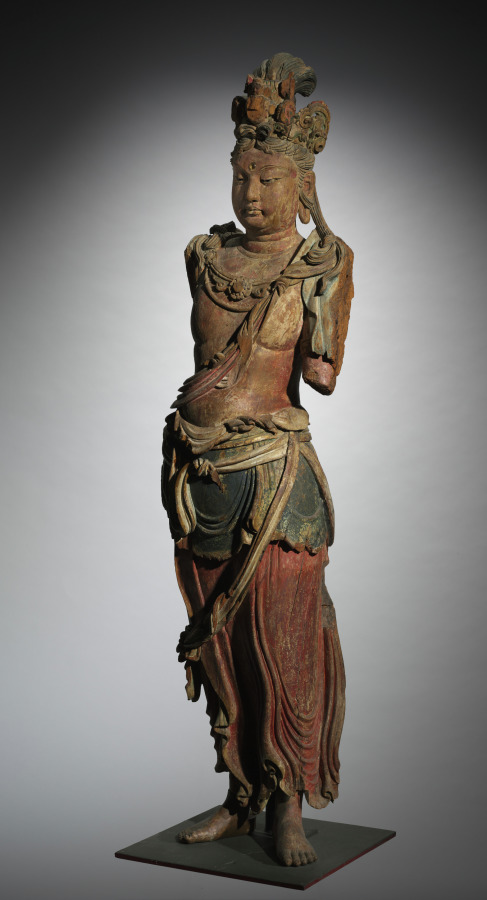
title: Eleven-Headed Guanyin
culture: China, late Northern Song dynasty (960-1127) - Jin dynasty (1115-1234)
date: 1100–1200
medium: wood with polychromy and cut gold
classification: Sculpture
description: The bodhisattva is an enlightened being dedicated to the spiritual awakening of all beings. The compassionate bodhisattva Guanyin, in a variety of manifestations, is probably the most popular deity of worship in Chinese Buddhism. In the Esoteric Buddhist form shown here, this standing Guanyin has a total of eleven heads, with smaller ones above the principal head. The uppermost head represents the Buddha Amitabha, to whom he is closely related. The eleven heads symbolize the Buddha’s steps on the path to enlightenment.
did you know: This Guanyin is carved from a single block of willow (genus Salix sp.).